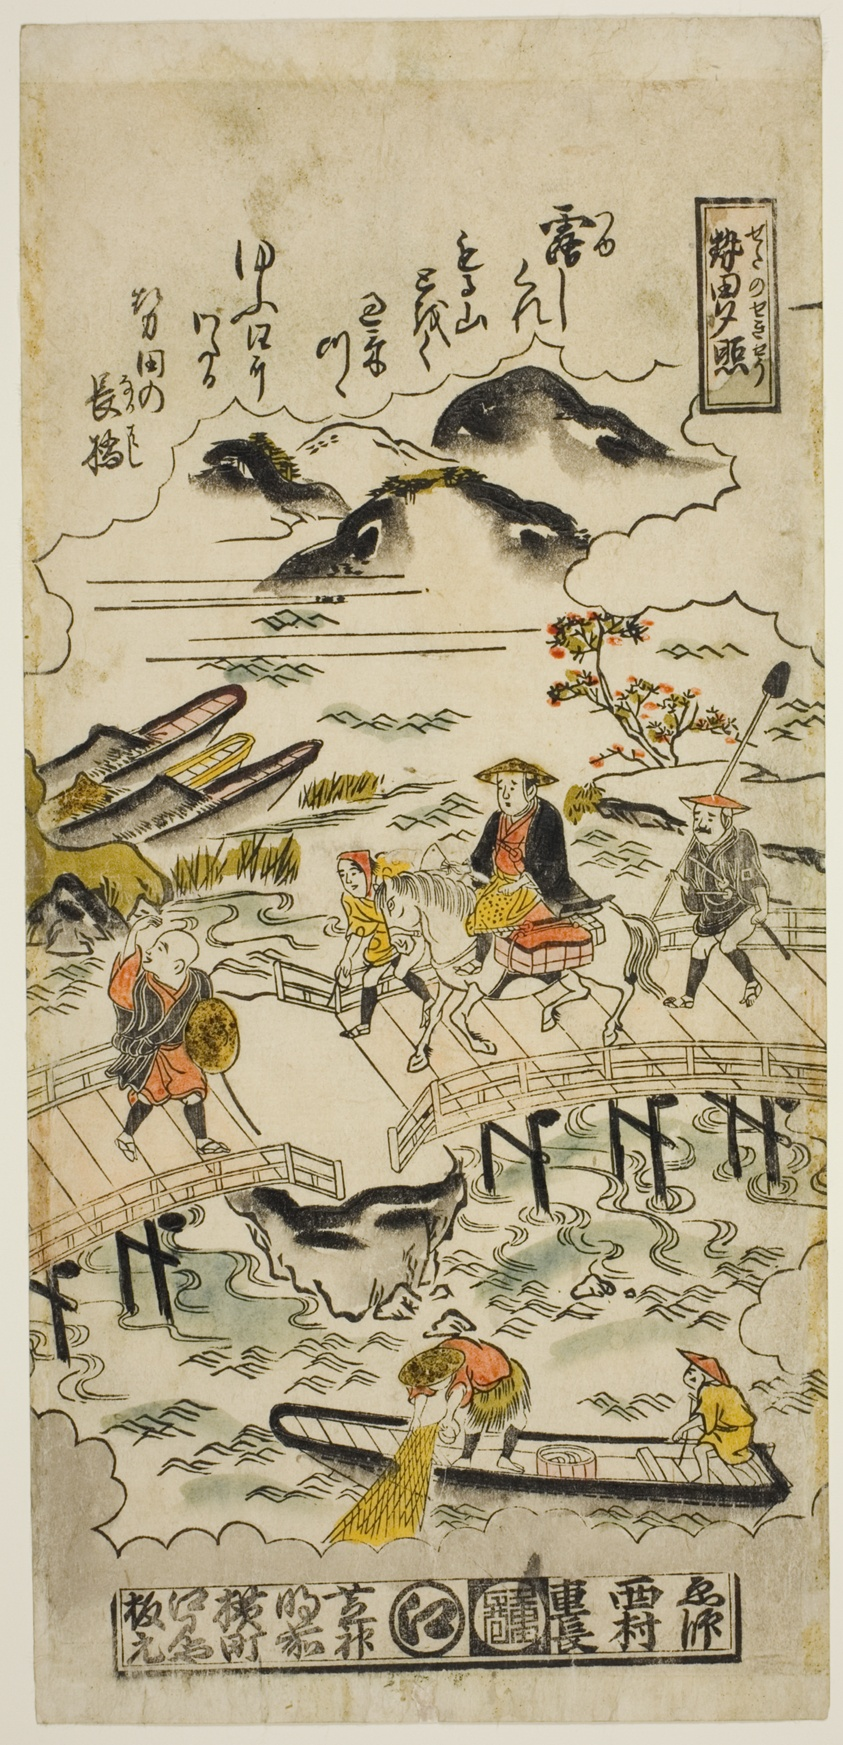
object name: Print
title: Evening Glow at Seta (Seta no sekisho), No. 1 from the series "Eight Views of Omi"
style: Japanese (culture or style)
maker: Nishimura Shigenaga (Japanese, 1697 (?)-1756)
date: c. 1716/36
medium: Hand-colored woodblock print; hosoban, urushi-e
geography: Japan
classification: woodblock print; print; asian art